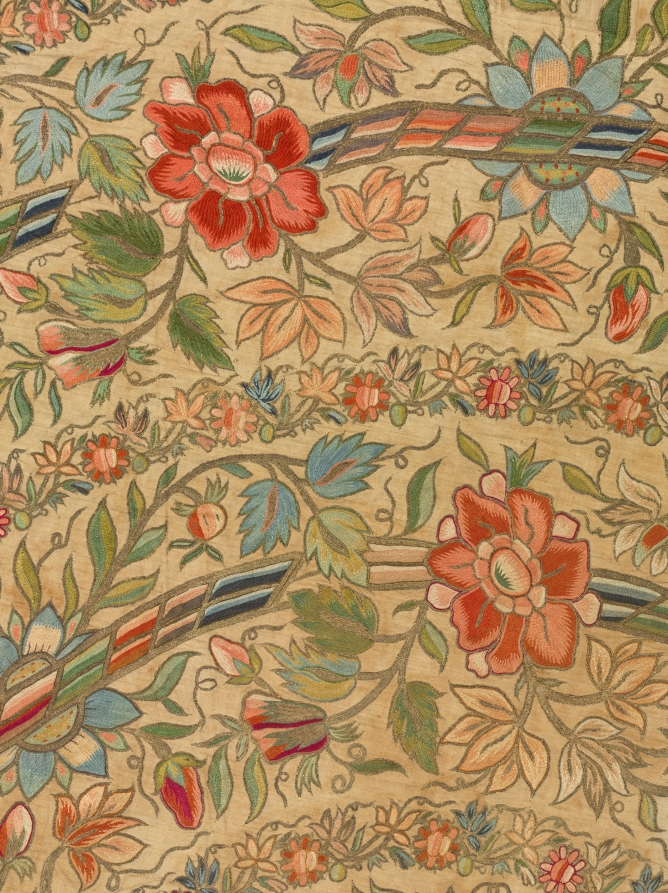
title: Embroidered tray cover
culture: Turkey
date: 1800s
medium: plain weave: linen; embroidery, chain stitch: silk and gilt-metal thread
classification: Embroidery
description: Elaborately embellished round embroideries often covered the metal trays that accompanied traditionally gracious Turkish hospitality and cuisine. Here, exuberant floral displays and garlands bearing large blossoms with shaded petals enrich the circular designs that feature extravagant gilt-metal thread and many lush colors of silk thread. The embroidered stitches almost conceal the linen ground in a spectacular tour-de-force.